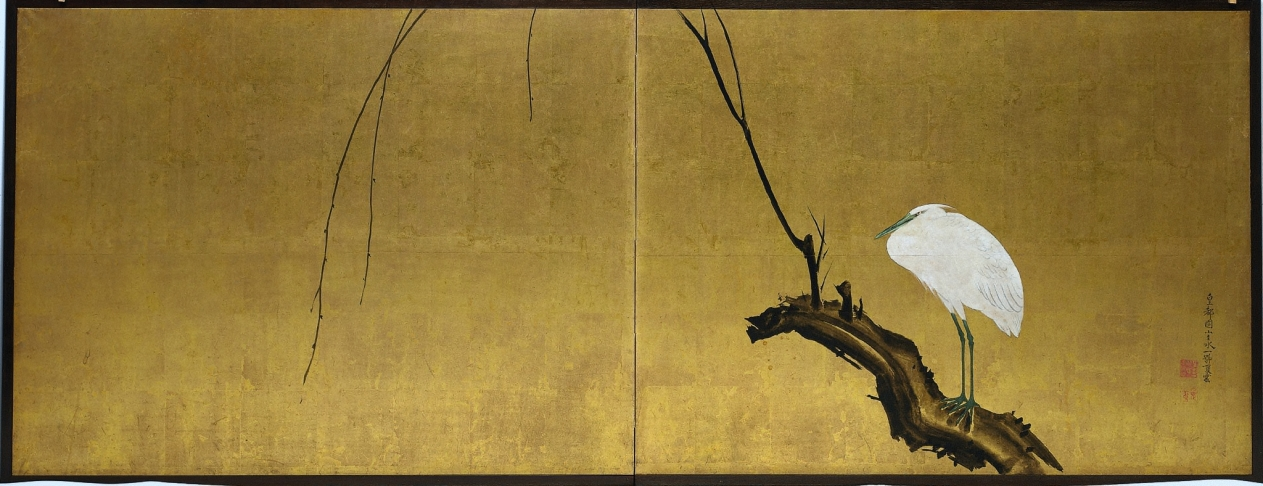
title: Heron on a Willow Branch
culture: Japan, Edo period (1615–1868)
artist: Maruyama Ōkyo (Japanese, 1733–1795)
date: late 1700s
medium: Two-panel folding screen; ink, color, lacquer, and gold on silk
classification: Painting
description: Okyo was the most influential painter and teacher of his time in Kyoto. His mastery of brush and ink found expression in a variety of Chinese and Japanese subjects, painting styles, and formats. This depiction of a heron on a willow branch is done in a classical Japanese painting (yamato-e) style, utilizing flat areas of colorful pigments set against an expansive background with little or no spatial depth.